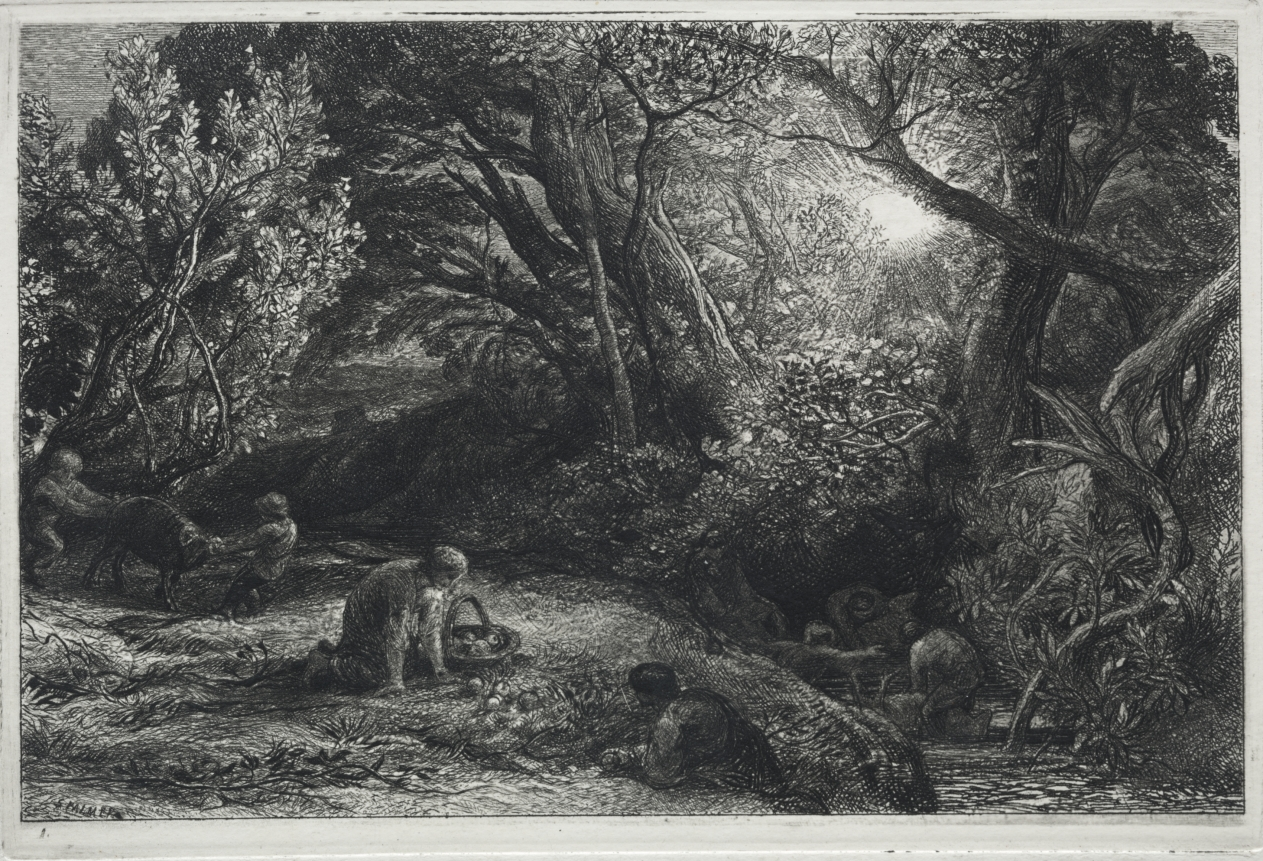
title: The Morning of Life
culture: England, 19th century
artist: Samuel Palmer (British, 1805–1881)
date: 1860–1861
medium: etching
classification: Print